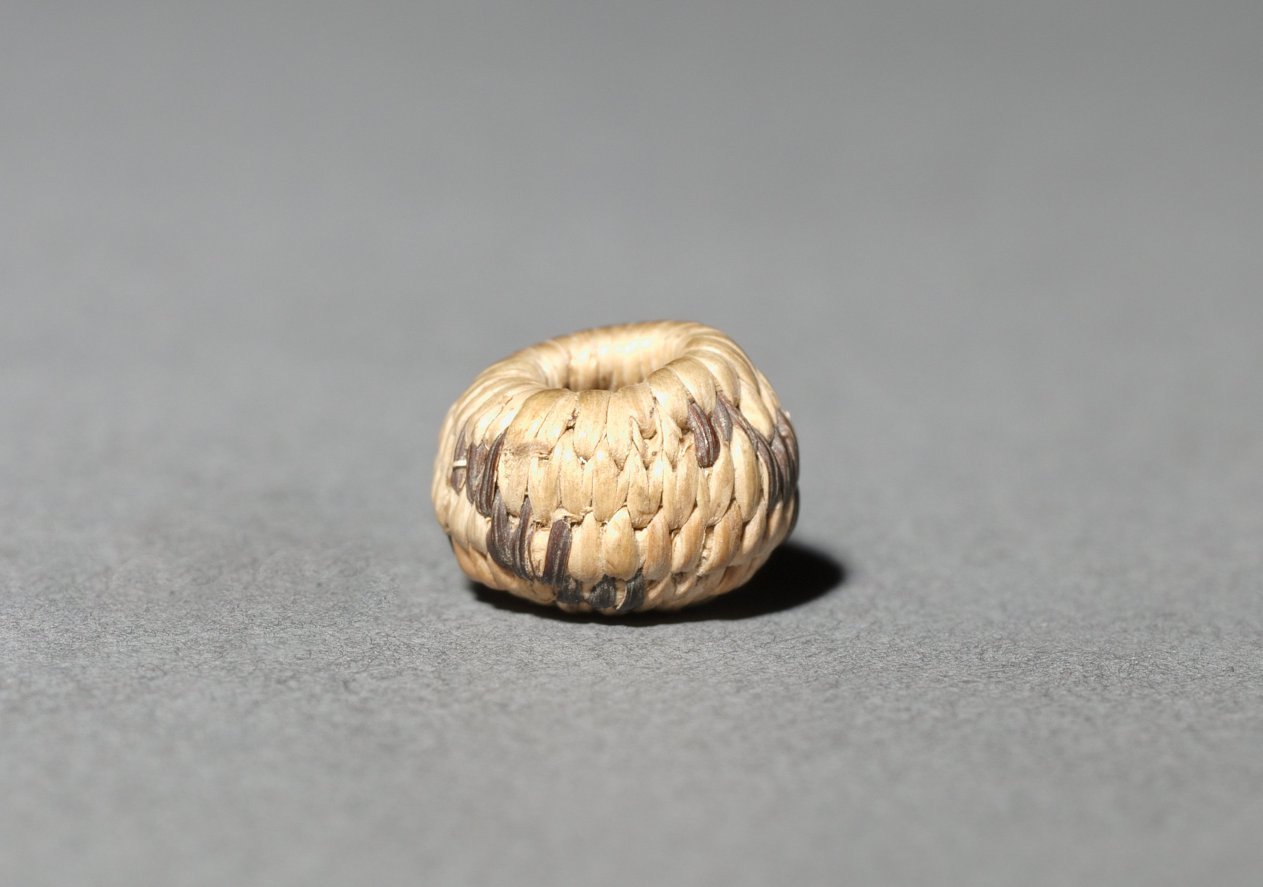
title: Miniature Basket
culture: America, Native North American, Southwest, Arizona, Akimel O'odham (Pima), Unassigned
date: before 1923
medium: plant fiber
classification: Basketry